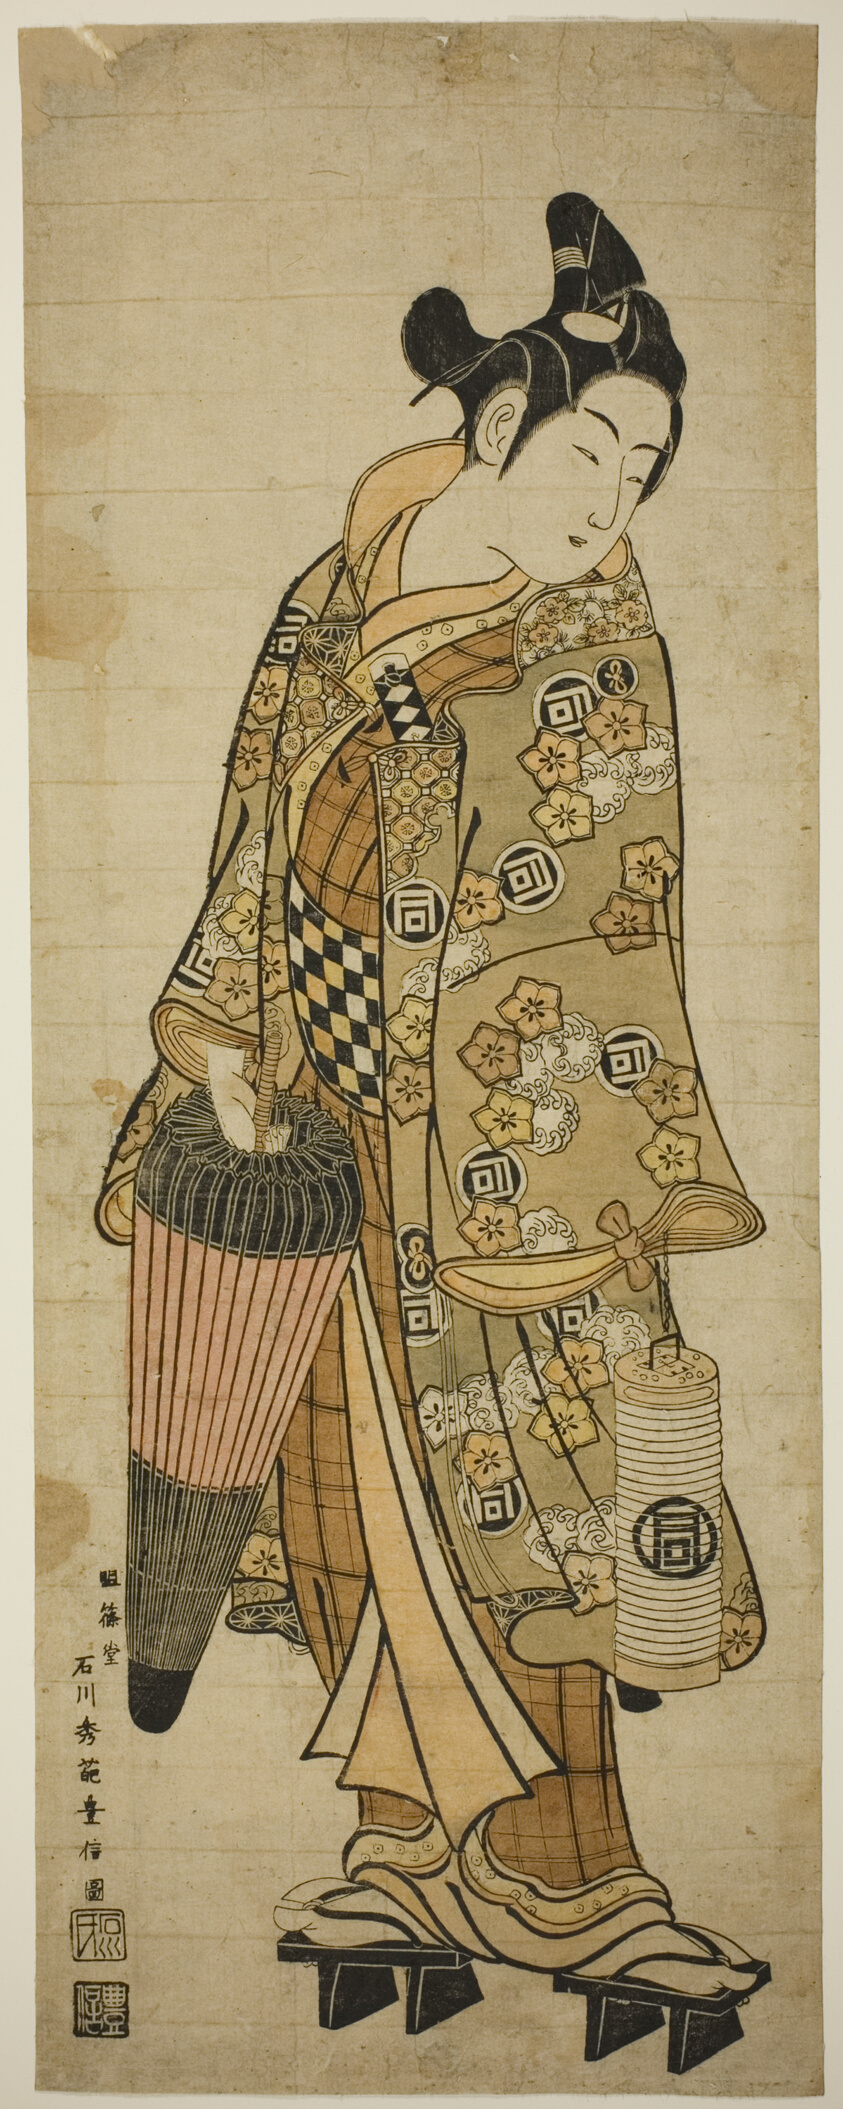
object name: Print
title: The Actor Sanogawa Ichimatsu I as a young man holding an umbrella and a lantern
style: Japanese (culture or style)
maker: Ishikawa Toyonobu (Japanese, 1711-1785)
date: c. 1748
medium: Hand-colored woodblock print; toku-oban, beni-e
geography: Japan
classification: woodblock print; print; asian art